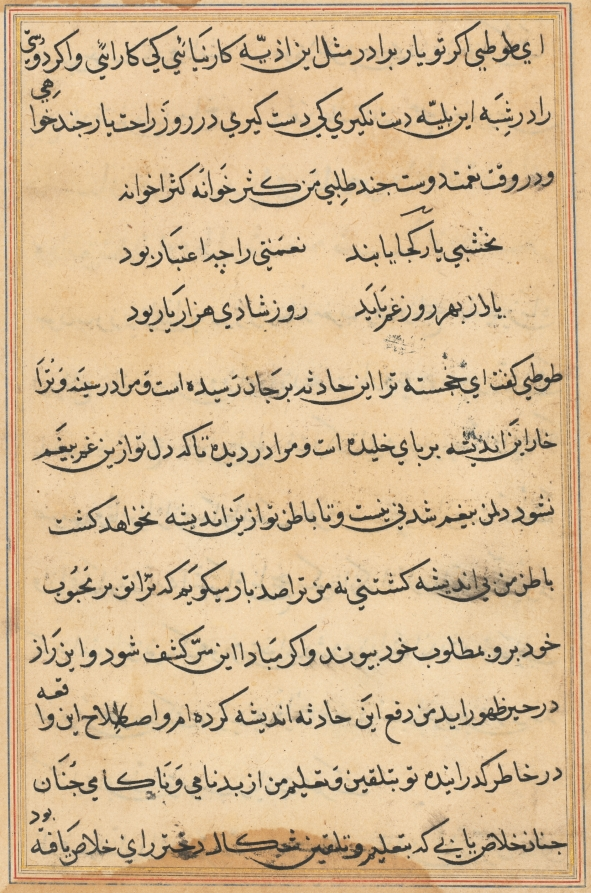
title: Page from Tales of a Parrot (Tuti-nama): text page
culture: Mughal India, court of Akbar (reigned 1556–1605)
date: c. 1560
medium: gum tempera, ink, and gold on paper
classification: Painting